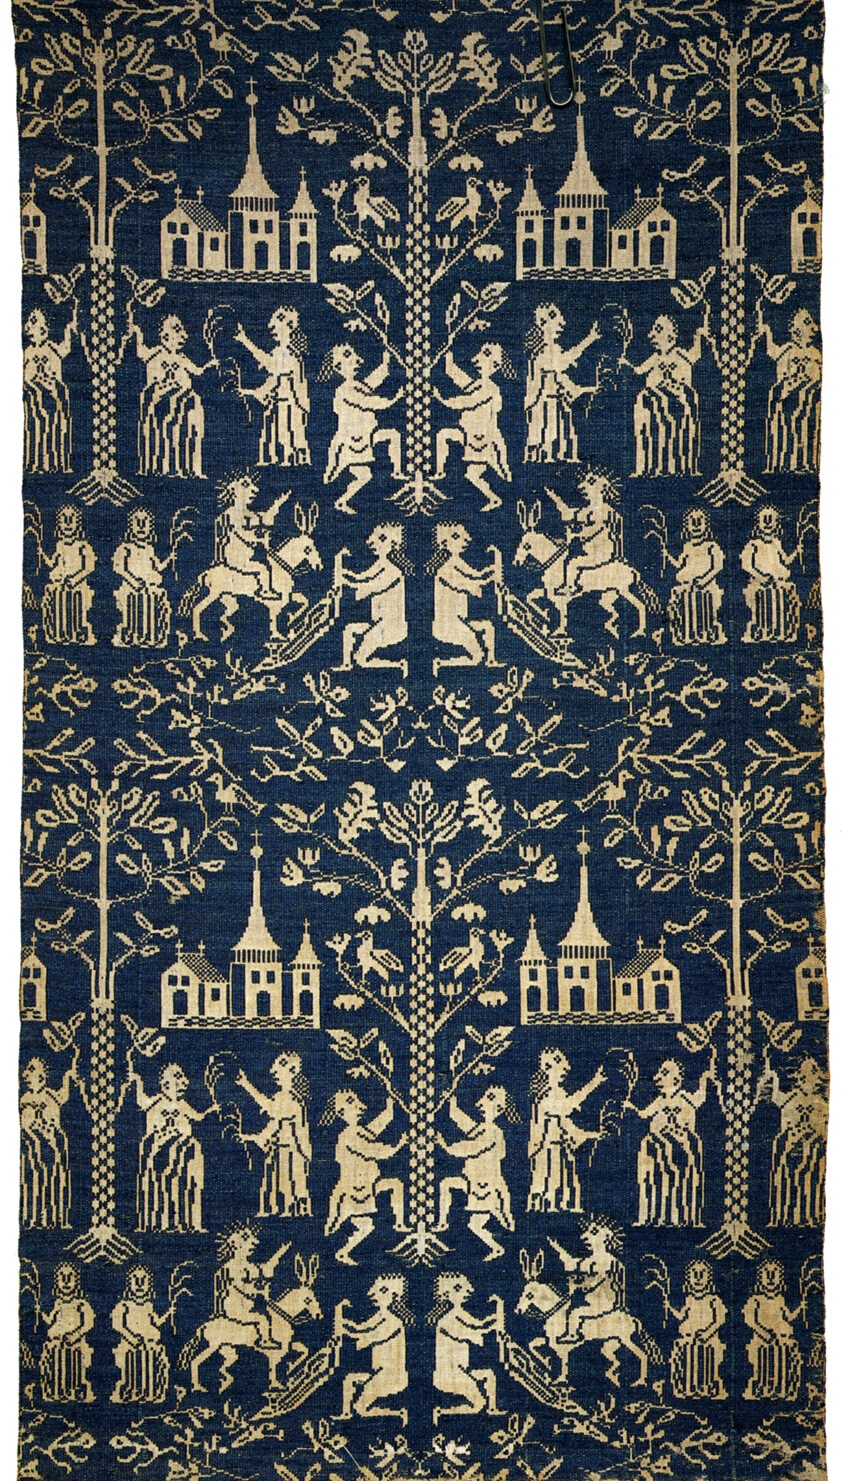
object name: Textile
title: Panel (Depicting Christ Entering Jerusalem)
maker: Denmark, Schleswig-Holstein (became part of Germany in 1815)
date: 17th century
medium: Linen and wool, plain weave with plain interlacing of secondary binding warp and patterning wefts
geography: Denmark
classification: textile; weaving